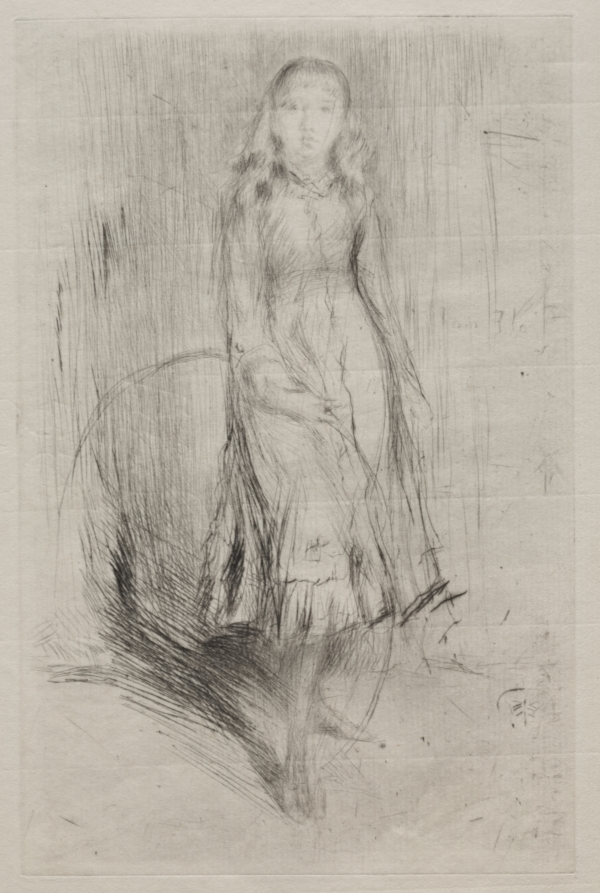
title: Florence Leyland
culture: America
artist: James McNeill Whistler (American, 1834–1903)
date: 1874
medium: drypoint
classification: Print